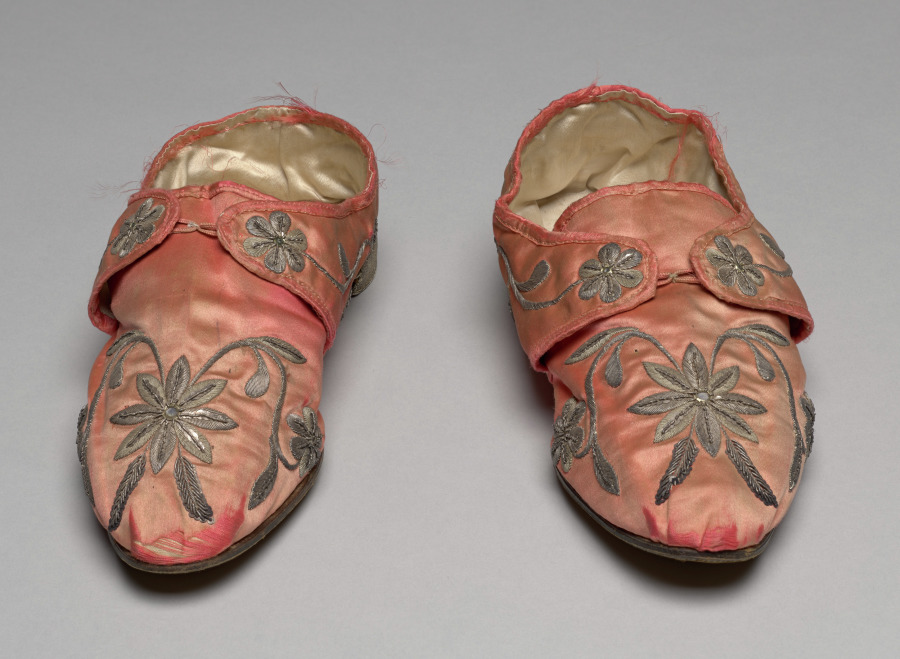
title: Pair of Slippers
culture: Italy, Venice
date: early 1700s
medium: Silk: satin weave with silver metal thread embroidery and trim; spangles; leather soles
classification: Garment